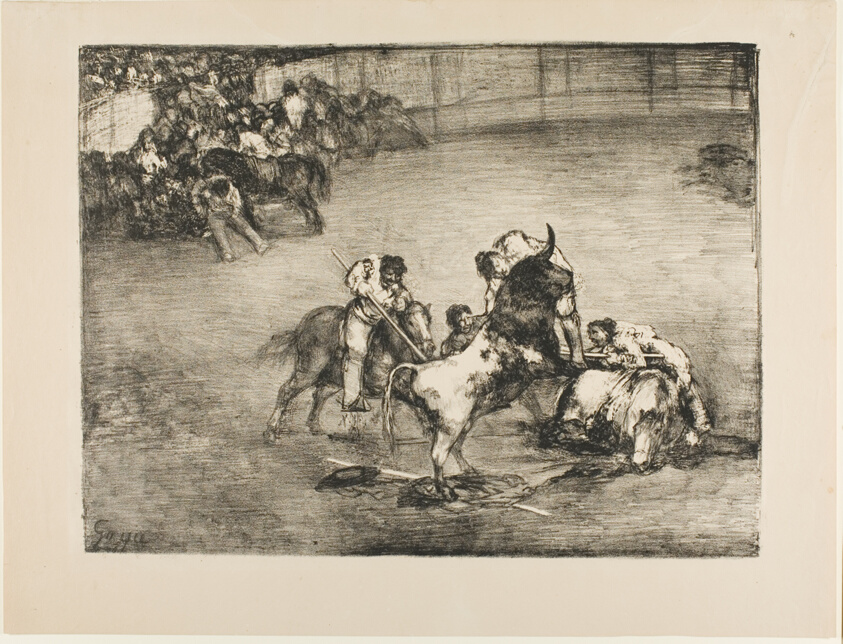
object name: Print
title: Picador Caught by a Bull, from The Bulls of Bordeaux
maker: Francisco José de Goya y Lucientes (Spanish, 1746-1828); printed by Cyprien Charles Marie Nicolas Gaulon (French, 1777-1858)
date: 1825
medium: Lithographic crayon and scraper in black on buff wove paper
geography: Spain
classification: lithograph; print; prints and drawing